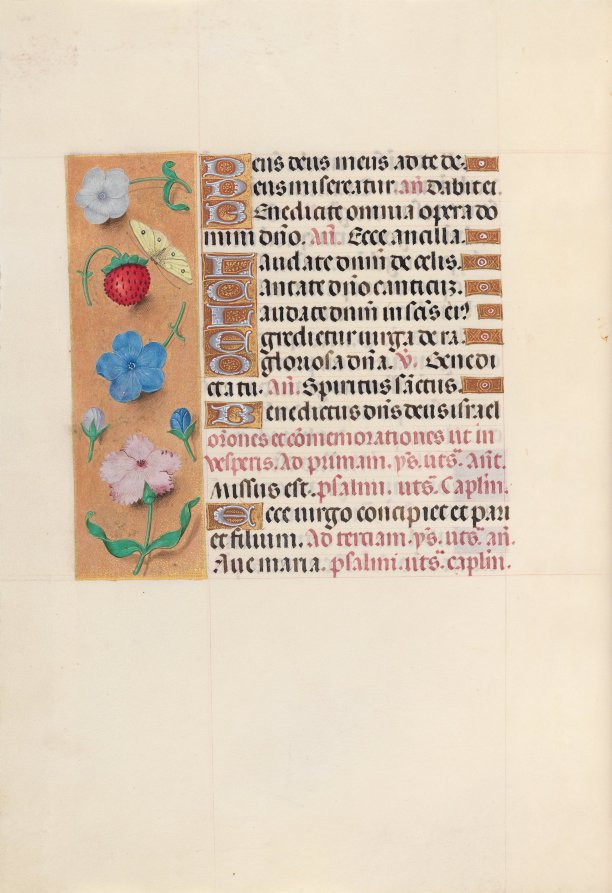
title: Hours of Queen Isabella the Catholic, Queen of Spain: Fol. 164v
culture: Flanders, Ghent and Bruges, late 15th century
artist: Master of the First Prayerbook of Maximillian (Flemish, c. 1444–1519)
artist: and Associates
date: c. 1500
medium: ink, tempera, and gold on vellum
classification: Bound Volume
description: This manuscript was illuminated by a circle of at least five highly organized manuscript painters active in the Flemish cities of Ghent and Bruges. The principal illuminator was Alexander Bening, who painted the majority of the book's miniatures. Manuscripts produced by this circle of artists are renowned for the decoration of their borders, which typically feature a rich variety of realistically-painted flowers, birds, and butterflies. This prayer book, called a book of hours, was intended not for a cleric, but for the private devotions of a lay person-in this case, Isabella the Catholic, Queen of Spain (1451-1504). Isabella's coat of arms embellishes the book's frontispiece. It is unlikely that the book was commissioned by the Queen herself; rather, she probably received it as a diplomatic gift from someone courting her patronage, perhaps Cardinal Francisco Jimenez de Cisneros. A Franciscan friar, Jimenez was dependent upon Isabella for his advancement, first to the post of Queen's confessor in 1492, and then to Archbishop of Toledo in 1495.